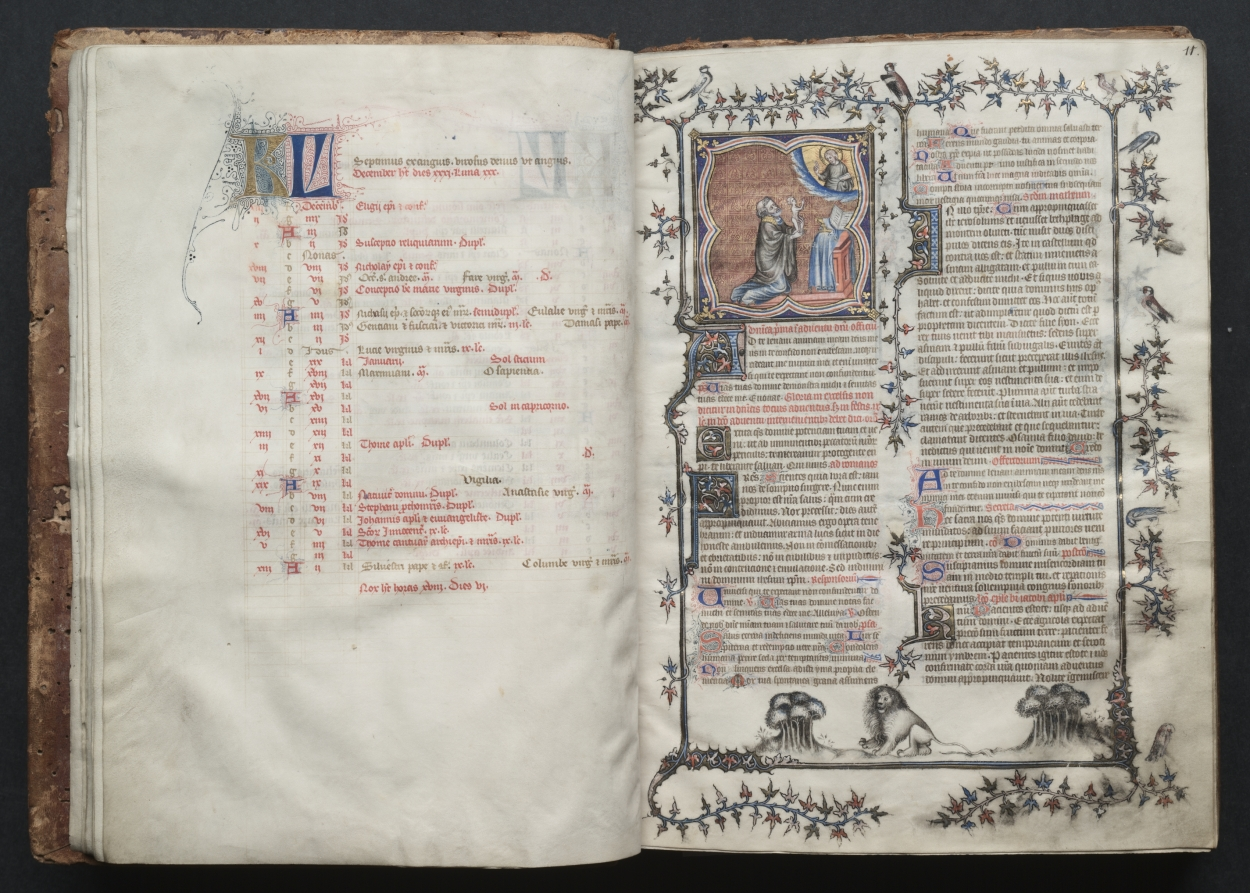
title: The Gotha Missal: Fol. 10v, Text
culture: France, Paris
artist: Master of the Boqueteaux (French)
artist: and Workshop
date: c. 1375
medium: ink, tempera, and gold on vellum; blind-tooled leather binding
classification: Bound Volume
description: The style and quality of this manuscript's decoration is typical of deluxe Parisian books made for aristocratic or royal patrons. Most of the book's decoration appears to be the work of the Master of the Boqueteaux, an artist active at the court of King Charles V (died 1380). His style was apparently shared by a number of book illuminators working in and around Paris. It is very possible that the Gotha Missal belonged to Charles V, but is not provable because the manuscript has no royal portraits and lacks a colophon. Given the book's magnificent decoration, however, it would seem that it was produced for a Valois prince, if not for the king himself. The manuscript receives its name from the German dukes of Gotha, its later owners.